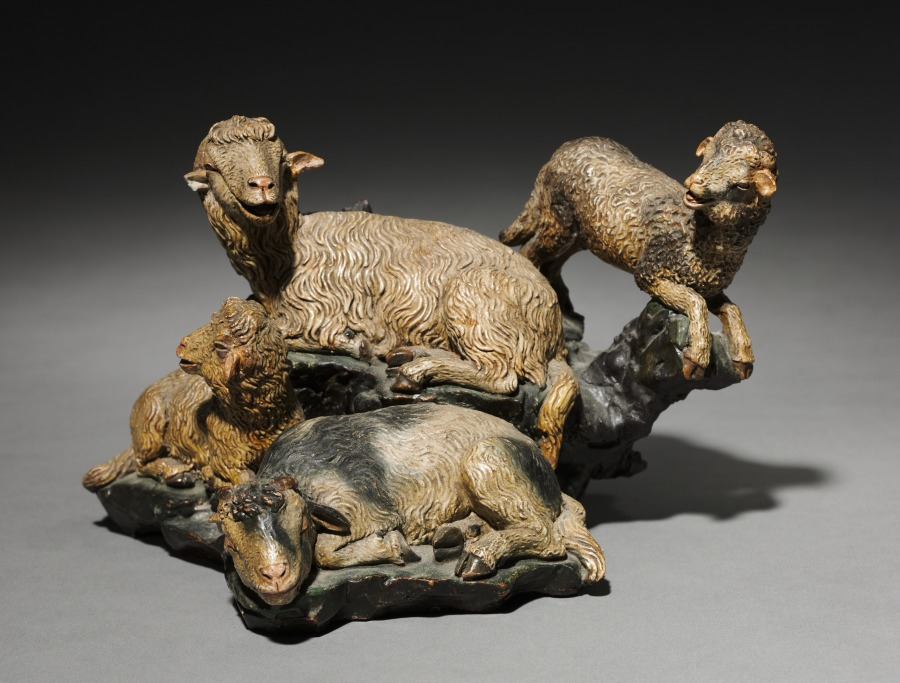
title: Figure from a Crèche: Group of Four Sheep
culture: Italy, Naples, late 18th-early 19th century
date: 1780–1830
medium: painted terracotta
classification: Sculpture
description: The practice of creating scenes of the Nativity for the home dates from the early 1700s in Italy, where people began to set up doll-like figures of about a foot or less in height. The custom was particularly popular in Naples around 1800, where crèche scenes (crèche means cradle, or crib) included many figures, whose heads and hands of painted terracotta, stuffed cloth bodies, and clothing adapted from contemporary local costumes gave them an amazingly realistic character. Representations of the birth of Jesus can be traced to the first few centuries of Christianity. Both living creatures and sculptural depictions of them were used from early times. By the late middle ages it was customary to create life-size figures of wood or stone, naturalistically painted, to represent the characters who participated in the events of Jesus's early life. These sculptures were then arranged in scenes illustrating one or both of the most important of these events, the Adoration of the Shepherds and the Adoration of the Magi-the three kings from the East who came to pay homage to the Christ child. Used in churches, these large figures were especially popular in Italy, Central Europe, Spain, and Portugal.